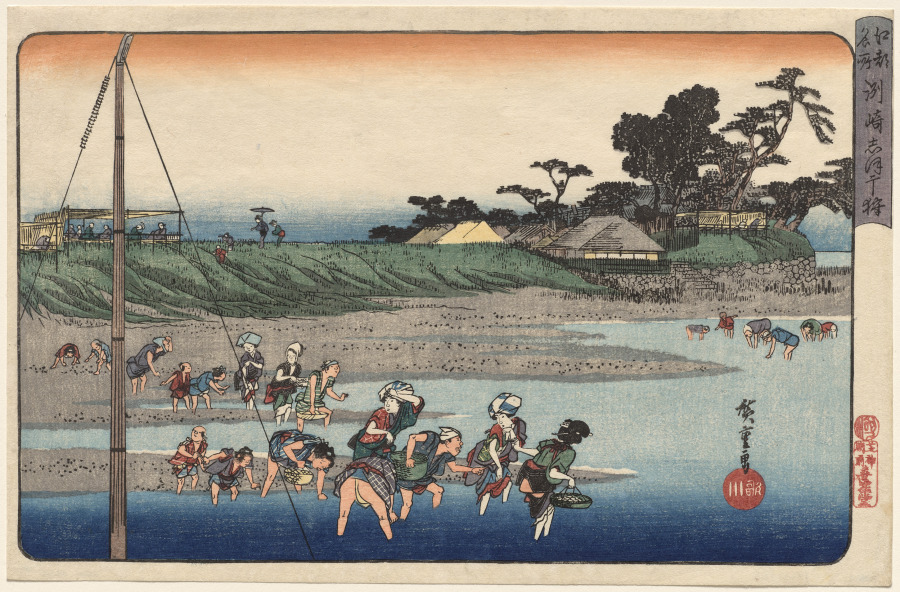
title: Gathering Shellfish at Low Tide at Susaki, from Famous Places in Edo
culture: Japan, Edo period (1615–1868)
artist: Utagawa Hiroshige (Japanese, 1797–1858)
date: mid-1830s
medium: color woodblock print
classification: Print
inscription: Signature: Hiroshige ga. Artist Seal: Utagawa.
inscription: Publisher: Sanoya Kihei (Kikakudō, Shiba shinmei mae). Censorship Seal: kiwame.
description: Susaki, a strip of land along Edo (now Tokyo) Bay, was known for excellent shellfish harvests during low tide in the spring. Utagawa Hiroshige designed this print so that the viewer seems to be floating in the bay on board a ship, whose mast and rigging span the left foreground. Instead of depicting the lives of wealthy elites, this landscape focuses on the working-class people wading into shallow water to fill their baskets with shellfish. Susaki Shrine is shown amid pine trees on the right, while the leisure class enjoying the sea breezes from a pavilion are reduced to small figures in the background.